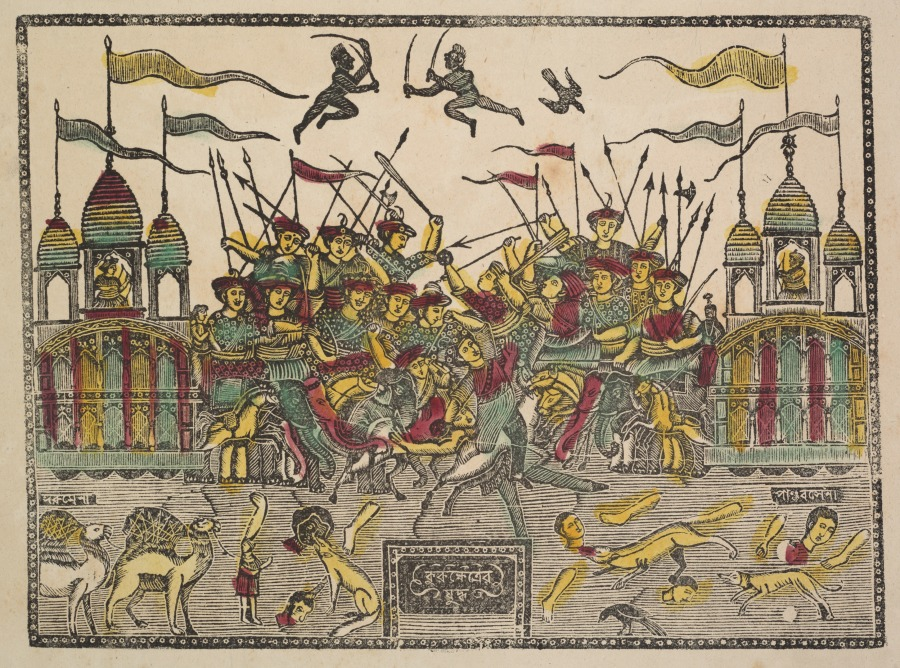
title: Battle Scene at Kurukshetra from the Mahabharata War (verso), from a Kalighat album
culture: Eastern India, Bengal, Kolkata, Kalighat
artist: Shri Gobinda Chandra Roy (Indian, active late 1800s)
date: c. 1890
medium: Woodcut, hand colored with gum tempera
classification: Painting